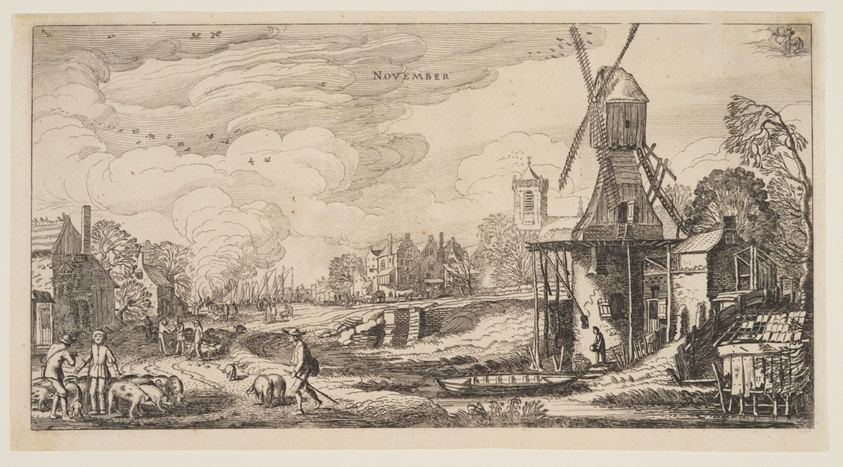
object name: Print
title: November, from The Twelve Months of the Year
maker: Jan van de Velde II (Dutch, c. 1593–1641); after Willem Buytewech (Dutch, c. 1591–1624)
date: 1616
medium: Etching on ivory laid paper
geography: Netherlands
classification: etching; paper; print; prints and drawing